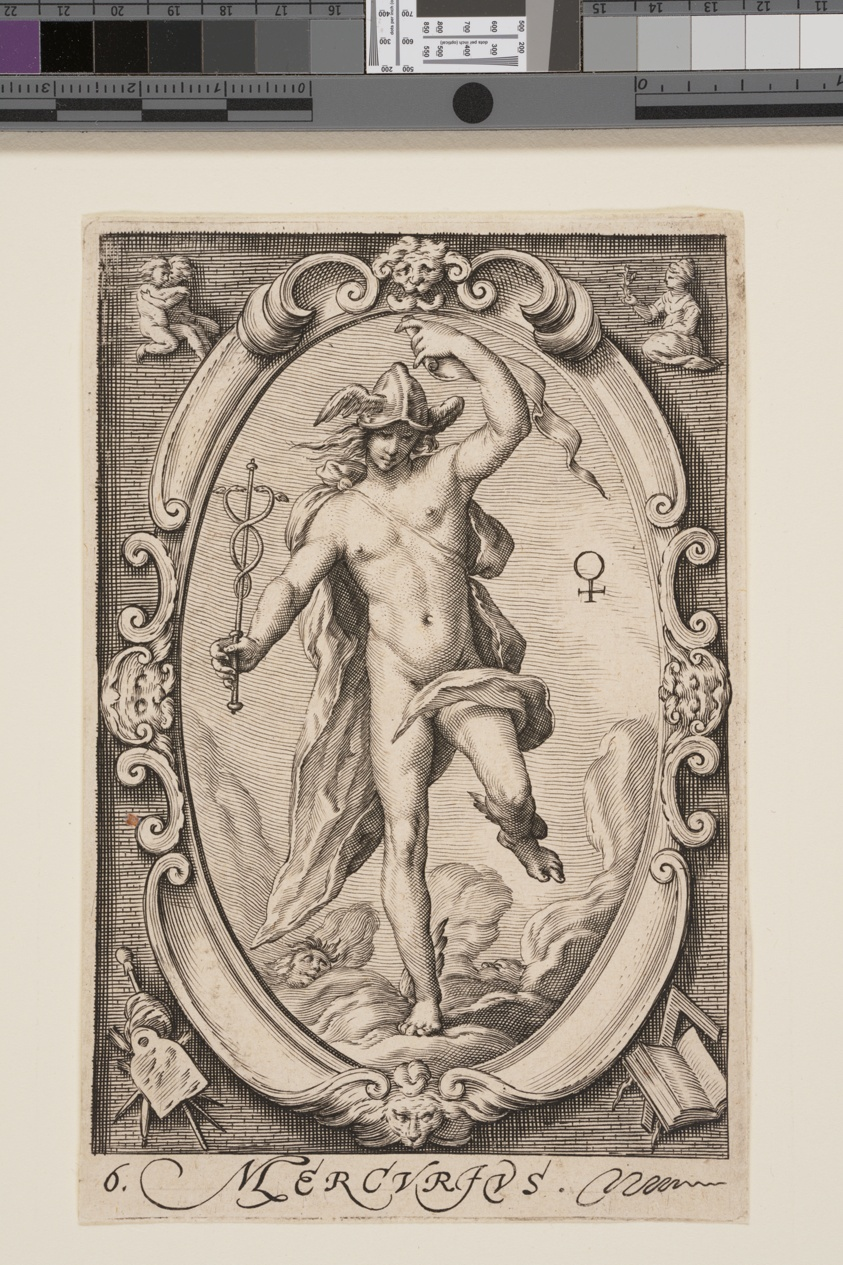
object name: Print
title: Mercury, from The Seven Planets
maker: Jacob Matham (Dutch, 1571–1631); after Hendrick Goltzius (Dutch, 1558–1617)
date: 1597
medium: Engraving on ivory laid paper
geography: Netherlands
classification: engraving; paper; print; prints and drawing